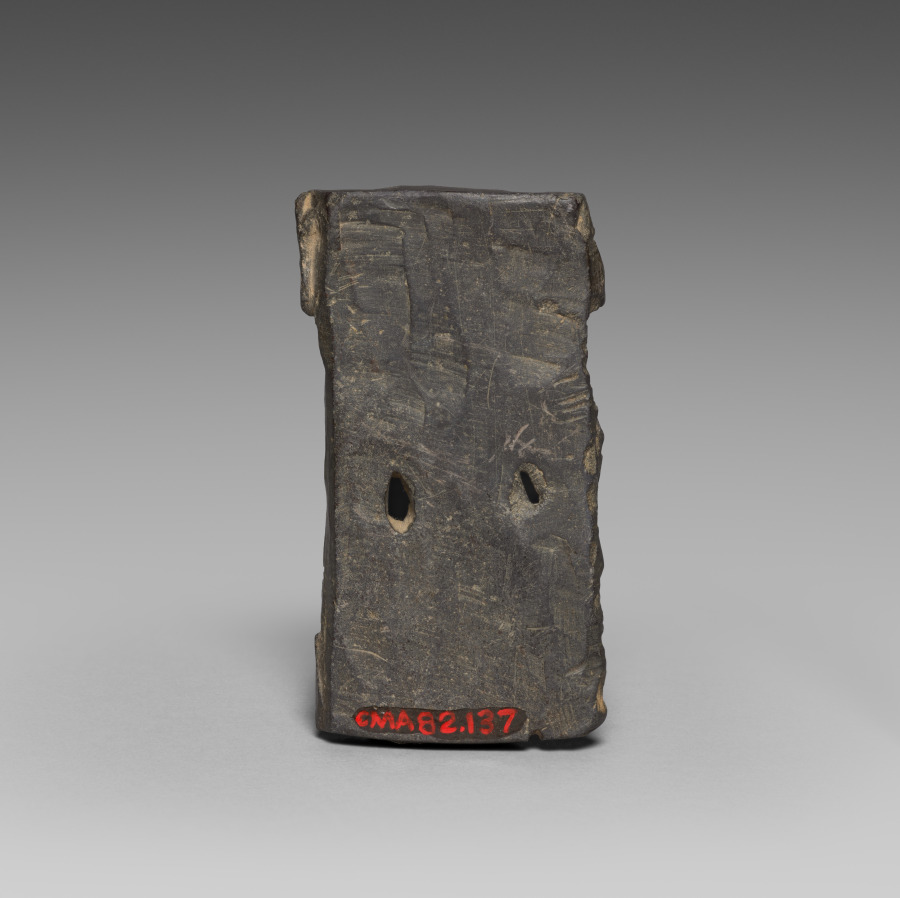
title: Male Figure, Possibly Indra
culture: Pakistan, Gandhara, possibly Swat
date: 300s–400s CE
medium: schist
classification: Sculpture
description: This carving appears to be unfinished, showing only the broad strokes of the male figure. The flat-topped crown is characteristic of Indra, which may be the identity of this figure.